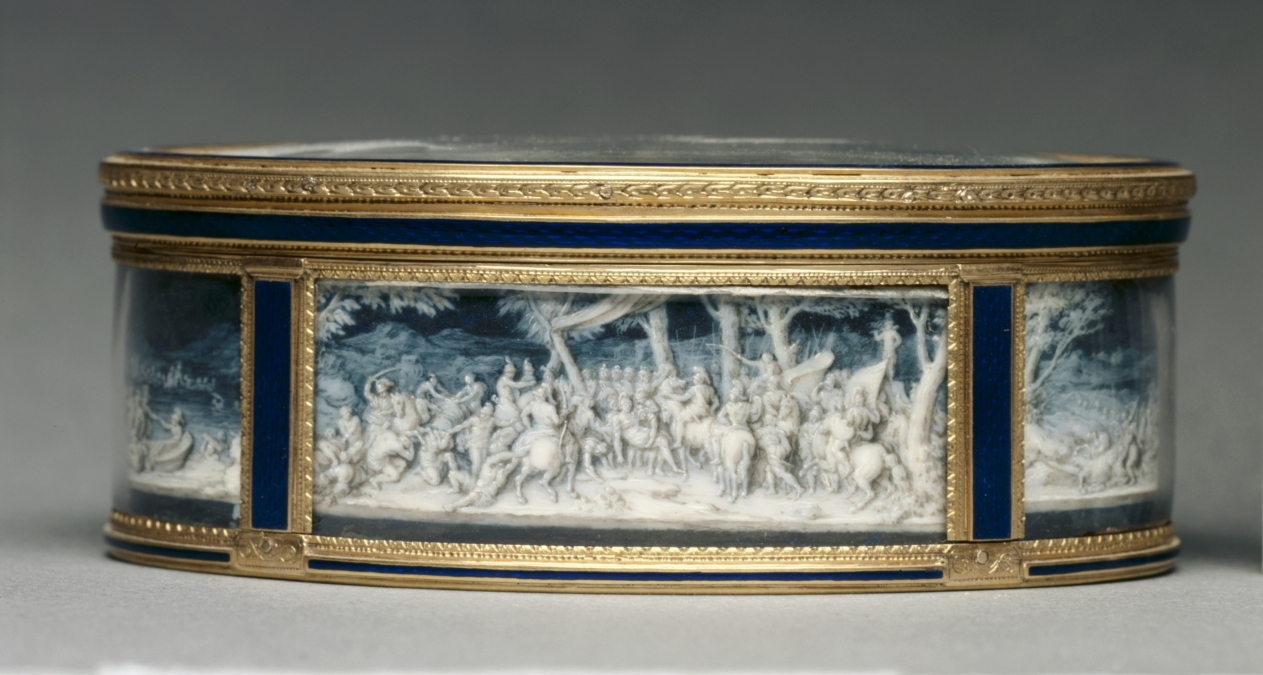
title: Snuff Box (Tabatière)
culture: France, 18th century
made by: Pierre Marie Gault De Saint-Germain (French, 1754–1842)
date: 1779–80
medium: gold and enamel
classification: Miscellaneous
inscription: [Warden's mark for Paris, 1779-1780, inside bottom; inside cover]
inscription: [Illegible maker's mark, inside bottom; inside cover]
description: Decorated with images derived from ancient Greek and Roman history in the style of cameos, intricately carved gemstones, this box evokes the rising neoclassical imagery in France. The scenes on the box recount several key events in the life of Alexander the Great. The enameled works were inspired by a series of prints by Sébastien Leclerc which drew from a series of paintings by Charles Le Brun.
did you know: The original series painted by Charles Le Brun, The Battles of Alexander (Les Batailles d’Alexandre) (1600s), was commissioned by King Louis XIV of France.